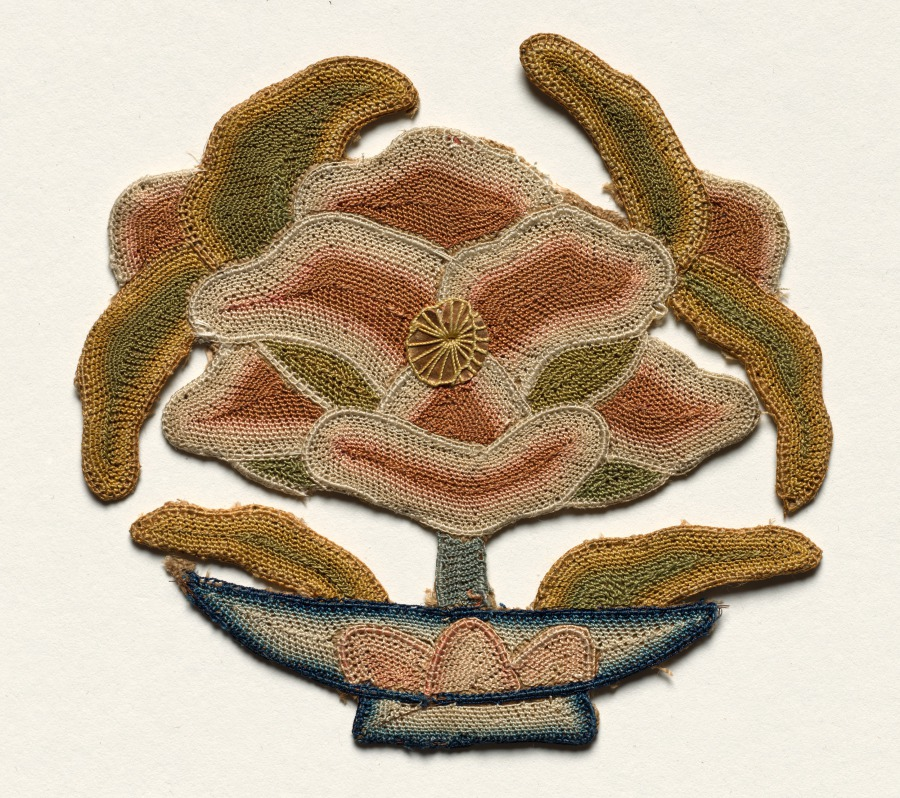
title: Fragment of Lotus Flower surrounded by Leaves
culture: China, 14th century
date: 1300s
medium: embroidery, needlelooping; silk and gold thread, silvered and gilded paper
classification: Embroidery